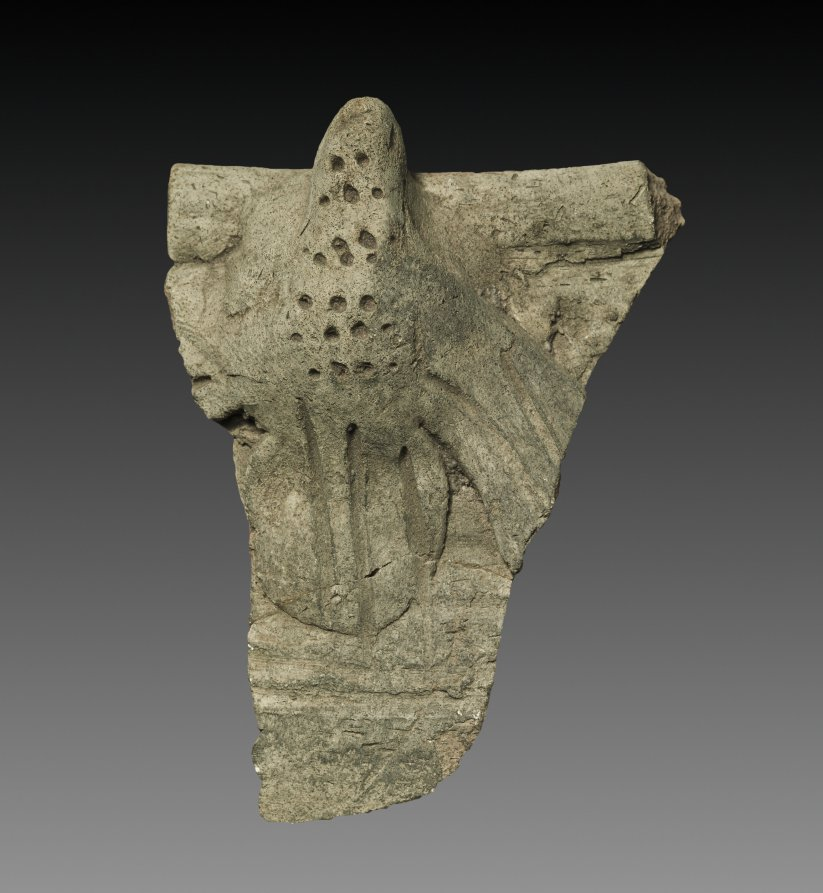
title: Rim Fragment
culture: Iran, Sasanian Empire (224–651 CE)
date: 222–650 CE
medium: earthenware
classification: Ceramic